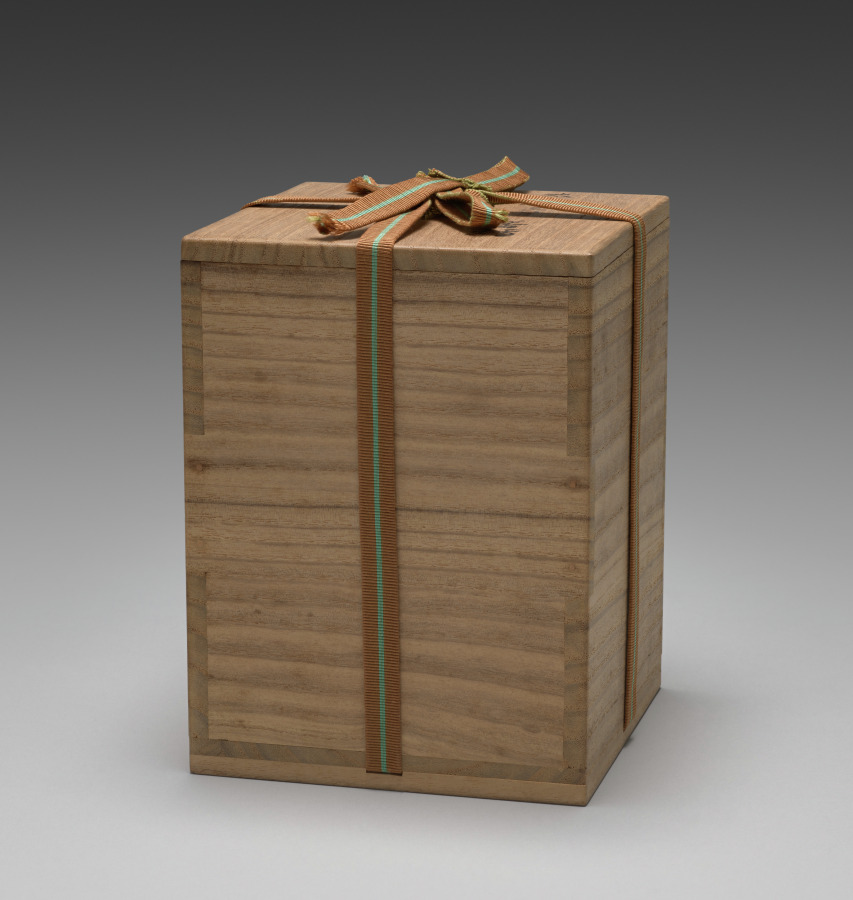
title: Incense Burner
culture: Japan, Meiji period (1868–1912)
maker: Seifū Yohei III (Japanese, 1851–1914)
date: 1893–1914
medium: Porcelain with creamy white glaze and molded design and floral openwork silver lid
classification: Ceramic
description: Yohei III made incense burners in a wide variety of designs and styles. The body and glaze of this one are taihakuji, or “great white porcelain,” an important early invention Yohei III devised in 1872. The burner has rounded, cabriole legs, resembling tiny table legs, attached to the exterior and the faintest decorative band around the bottom. Lids were produced outside the studio by metalwork specialists. For this incense burner, they created a floral-patterned silver lid.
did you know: This cylindrical incense burner has a distinctive translucent, creamy glaze over an ivory-colored clay body.